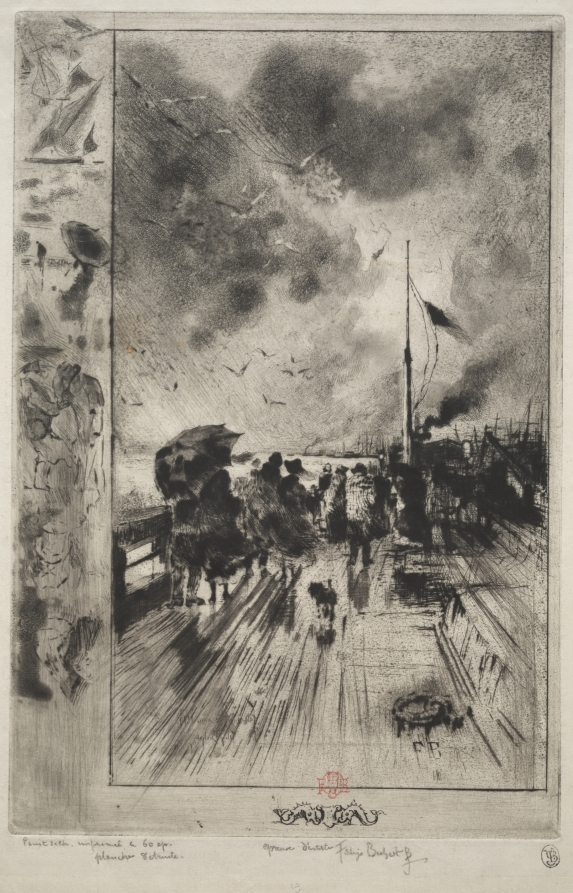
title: A Pier in England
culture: France, 19th century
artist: Félix Hilaire Buhot (French, 1847–1898)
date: 1879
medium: drypoint, roulette and aquatint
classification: Print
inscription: inscribed, lower center, in graphite: "epreuve d'artiste"; signed, lower center, in graphite: "Felix Buhot FB"; inscribed, lower left, in graphite: "point seche. imprimee à 60 ep./ planche detruite"